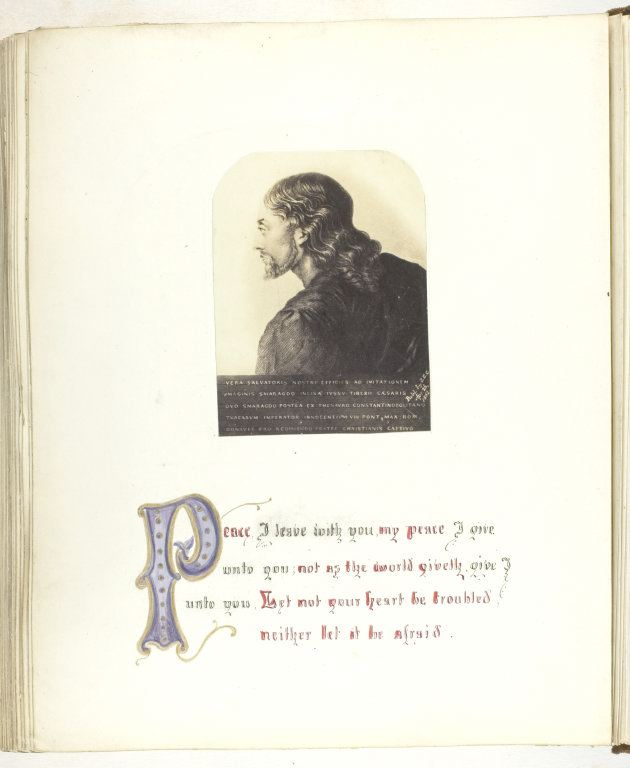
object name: Photograph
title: Untitled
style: 19th century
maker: Georgina Cowper, attributed; English, mid 19th century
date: 1855/68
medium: Albumen print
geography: England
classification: photograph; albumen silver print; photography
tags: Collected by Hugh Edwards, Untitled Album 1849-60, Auld Lang Syne